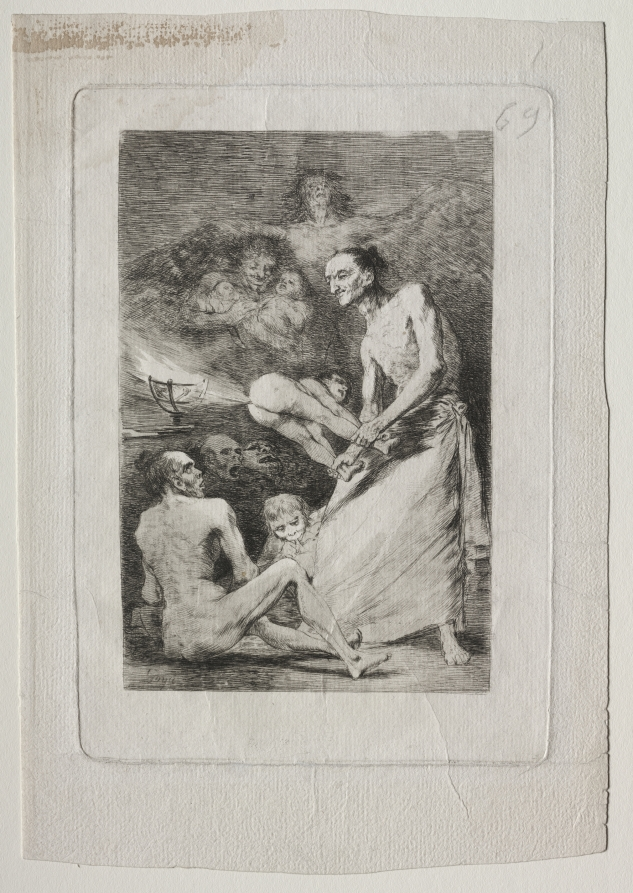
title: Blow, Plate 69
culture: Spain, late 18th-early 19th Century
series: Los Caprichos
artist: Francisco de Goya (Spanish, 1746–1828)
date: 1799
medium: etching, aquatint, drypoint and engraving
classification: Print